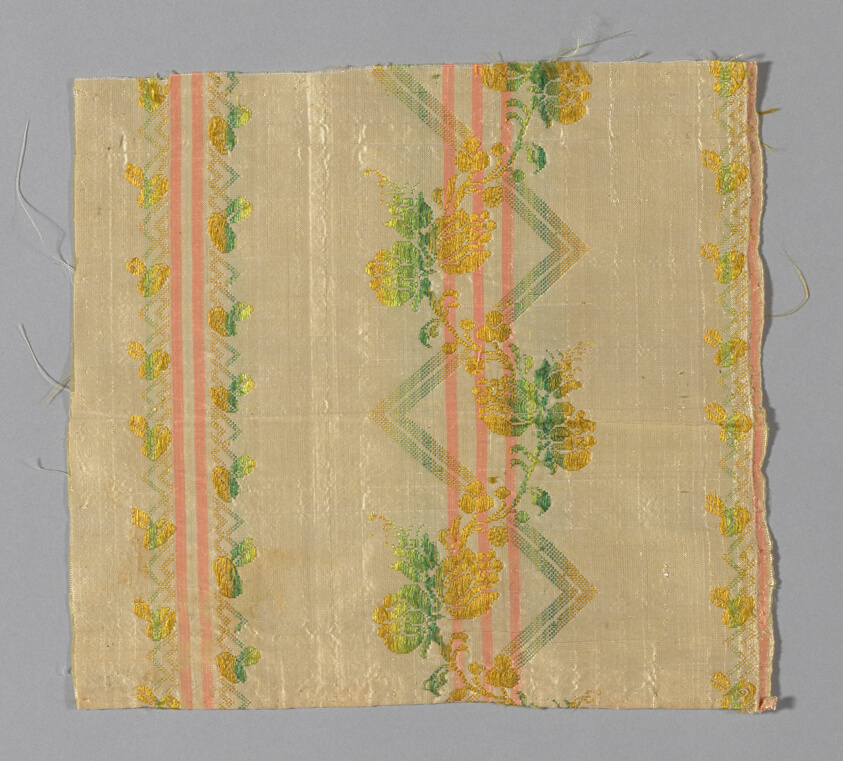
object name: Textile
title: Fragment (Dress Fabric)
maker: France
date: 1775/1800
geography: France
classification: textile; weaving